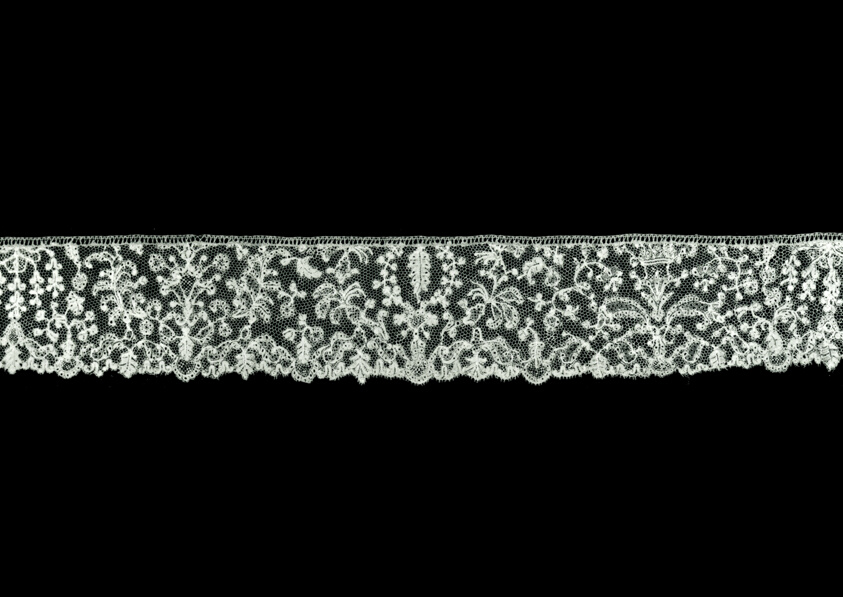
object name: Textile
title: Border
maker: Flanders, Brussels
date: c. 1700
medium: Linen, bobbin part lace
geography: Brussels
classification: textile; lace - bobbin